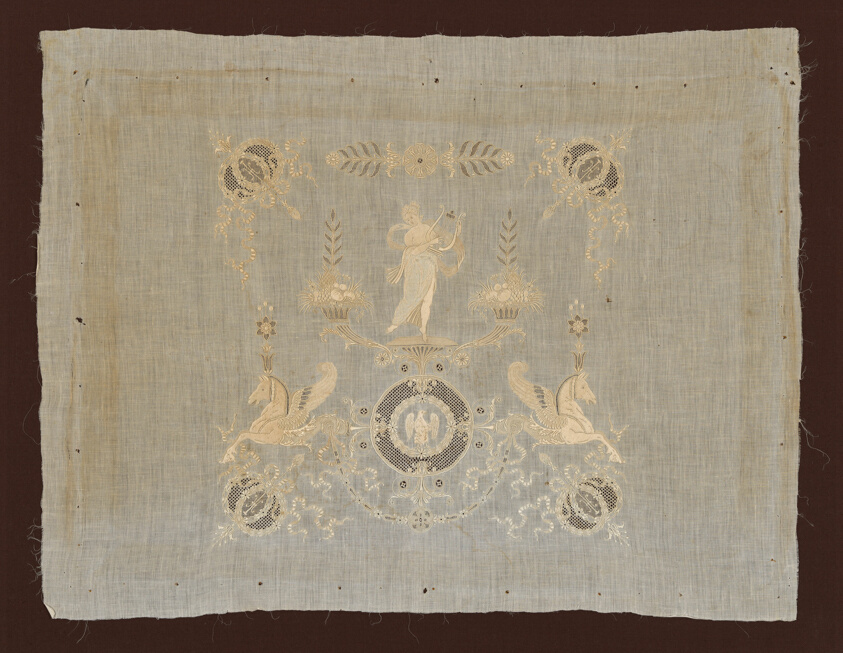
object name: Textile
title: Panel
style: empire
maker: After designs by Charles Percier (French, 1764–1838) and Pierre François Leonard Fontaine (French, 1762–1853); France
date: 1804/15 or 1852/70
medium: Linen, plain weave; cotton embroidery thread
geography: France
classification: textile; needlework (visual works)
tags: mythology